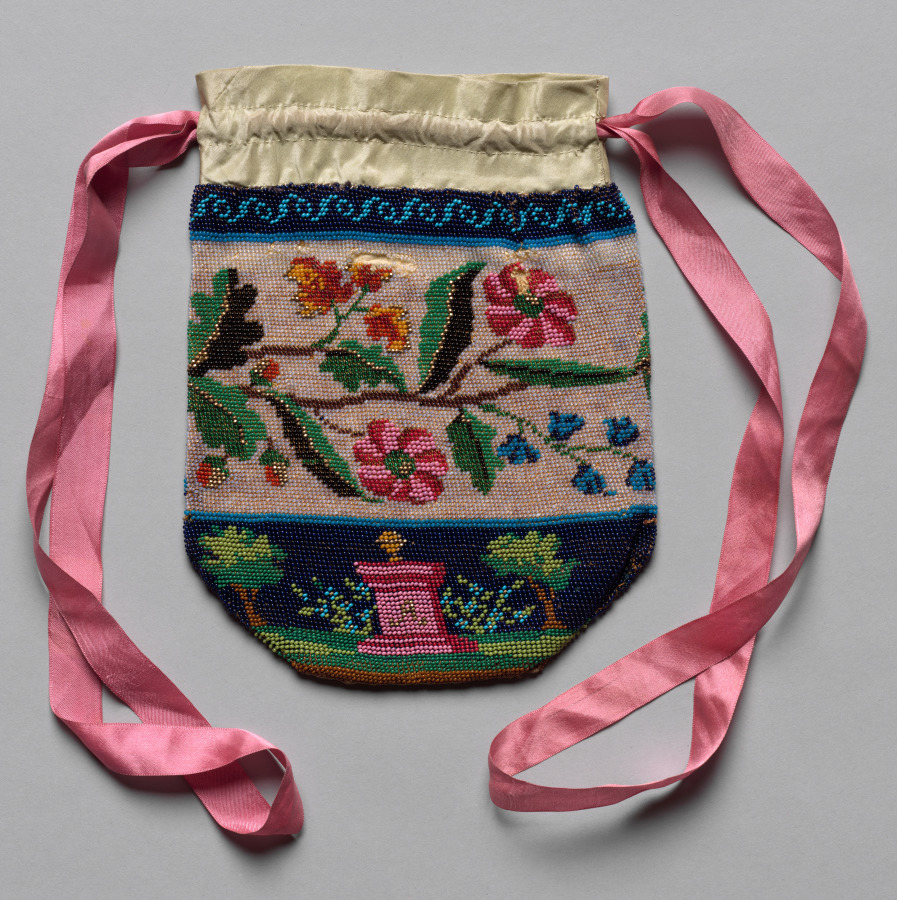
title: Beaded Bag (floral motif)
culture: America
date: 19th century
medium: silksatin, glass beads, pink ribbon strap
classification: Garment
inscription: grave monument with initial "A" on it; cream leather lining signed: "Sarah W. Baker."